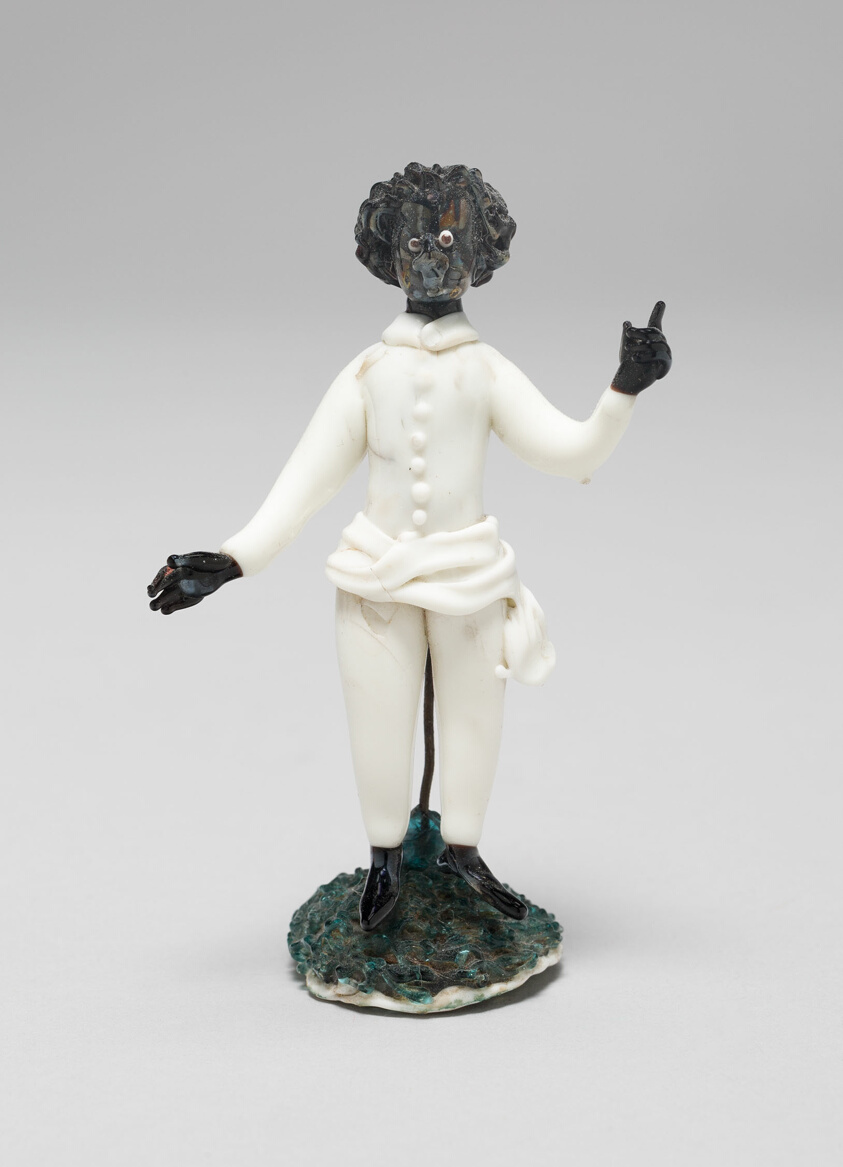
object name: Glass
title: Figure of a Man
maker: Nevers, France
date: Early 18th century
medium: Glass; lampwork (verre de Nevers), metal armature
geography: France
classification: decorative object/ornament; lampwork; glass; european decorative arts